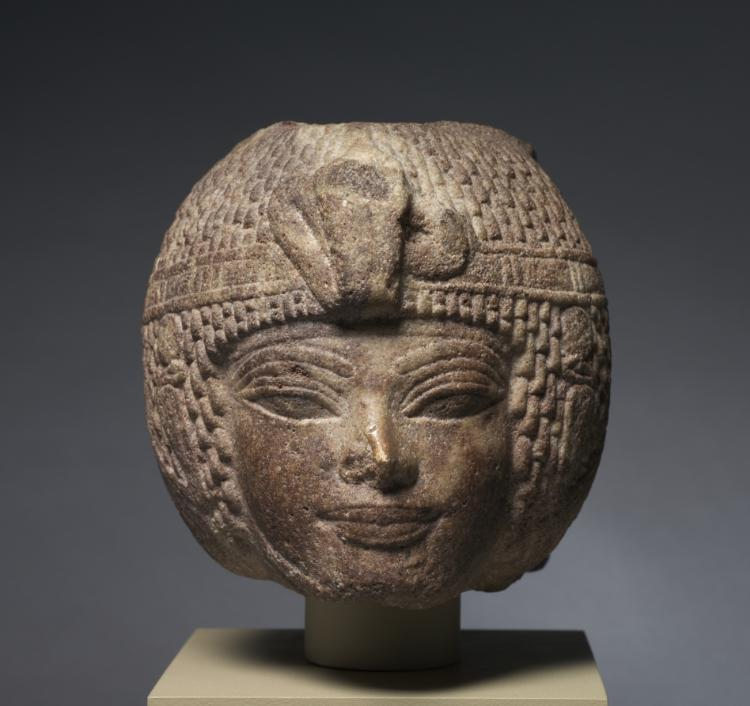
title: Head of Amenhotep III Wearing the Round Wig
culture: Egypt, New Kingdom (1540–1069 BCE), Dynasty 18, reign of Amenhotep III (1390–1352 BCE)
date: c. 1391–1353 BCE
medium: brown quartzite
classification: Sculpture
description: Although he must have been nearly 50 years old when this portrait was carved, Amenhotep III appears more youthful than ever. Over a round, curly wig he wears a diadem with side streamers adorned with cobras bearing sun disks on their heads. The stone quartzite was associated with the sun on account of its ruddy hues, ranging in color from brown to red to purple. It was a favorite of Amenhotep III, the king who called himself the "dazzling sun-disk of all lands."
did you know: Amenhotep wears a chin strap that would have held up a false beard.